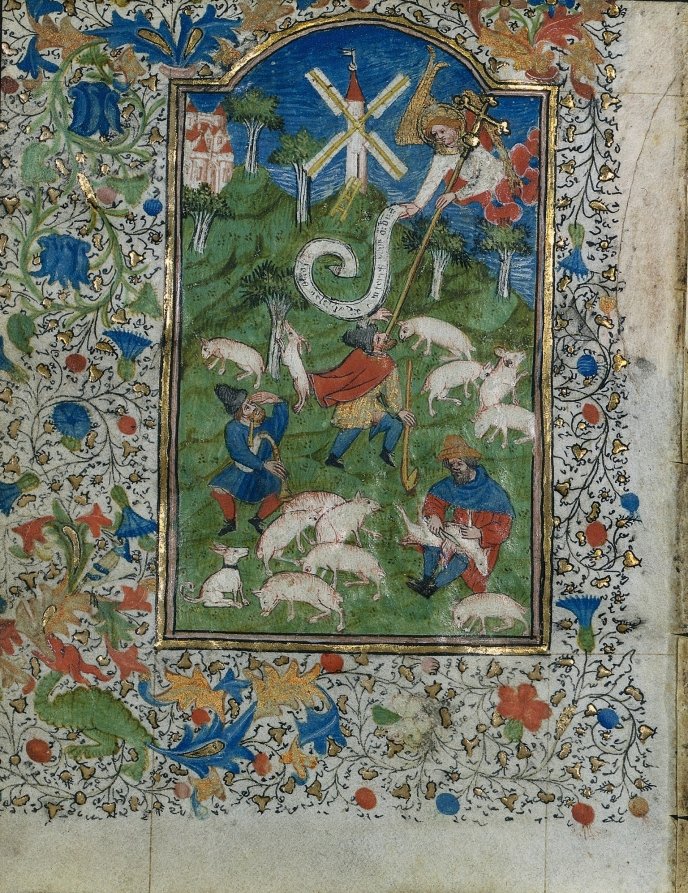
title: Annunciation to the Shepherds: Leaf from a Book of Hours (1 of 6 Excised Leaves)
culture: France, Metz, 15th century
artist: Henri d'Orquevaulx (French)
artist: or Workshop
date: c. 1420–30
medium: ink, tempera, and gold on vellum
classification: Manuscript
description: This leaf survives from what must have been an extraordinarily rich book of hours. The elaborate Passion cycle and Suffrages point to an important patron. Internal evidence within the original calendar and texts indicates that Metz was the probable place of production. Stylistically, the illuminations appear to come from the workshop of Henri d’Orquevaulx, a documented Metz manuscript painter. Compositionally, structurally, and stylistically, the miniatures suggest strong links to Netherlandish illumination. It is not known whether d’Orquevaulx came originally from the Netherlands or whether he simply worked or trained there at some point in his career.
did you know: Books of hours were devotional books popular in the Middle Ages and meant for laypeople, or those not in the clergy.